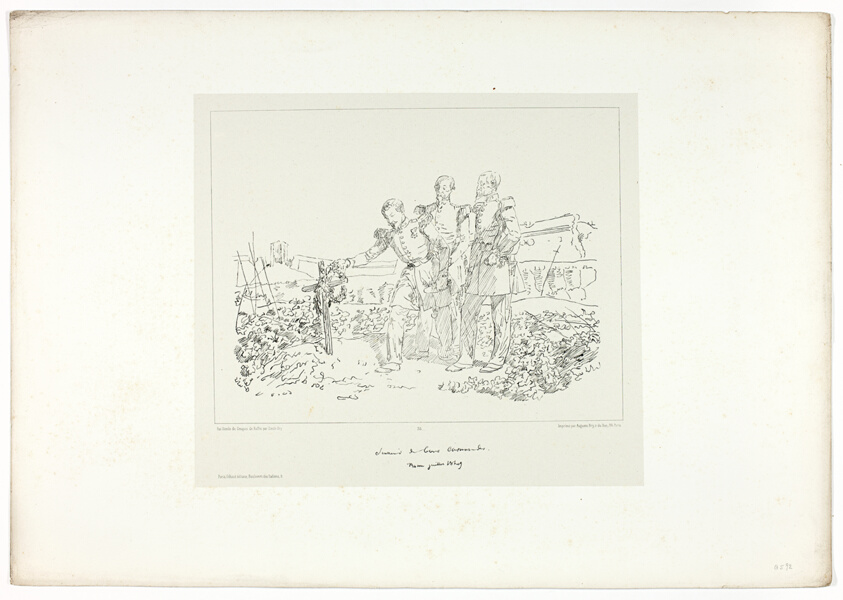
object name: Print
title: Rememberance of good comrades, from Souvenirs d’Italie: Expédition de Rome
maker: Émile Bry (French, 19th century); after Denis Auguste Marie Raffet (French, 1804-1860); printed by Auguste Bry (French, 19th century); published by Chez Frères Gihaut (French, 19th century)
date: published December, 1860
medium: Lithograph in black on warm ivory wove chine laid down on off-white wove paper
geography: France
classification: lithograph; print; prints and drawing